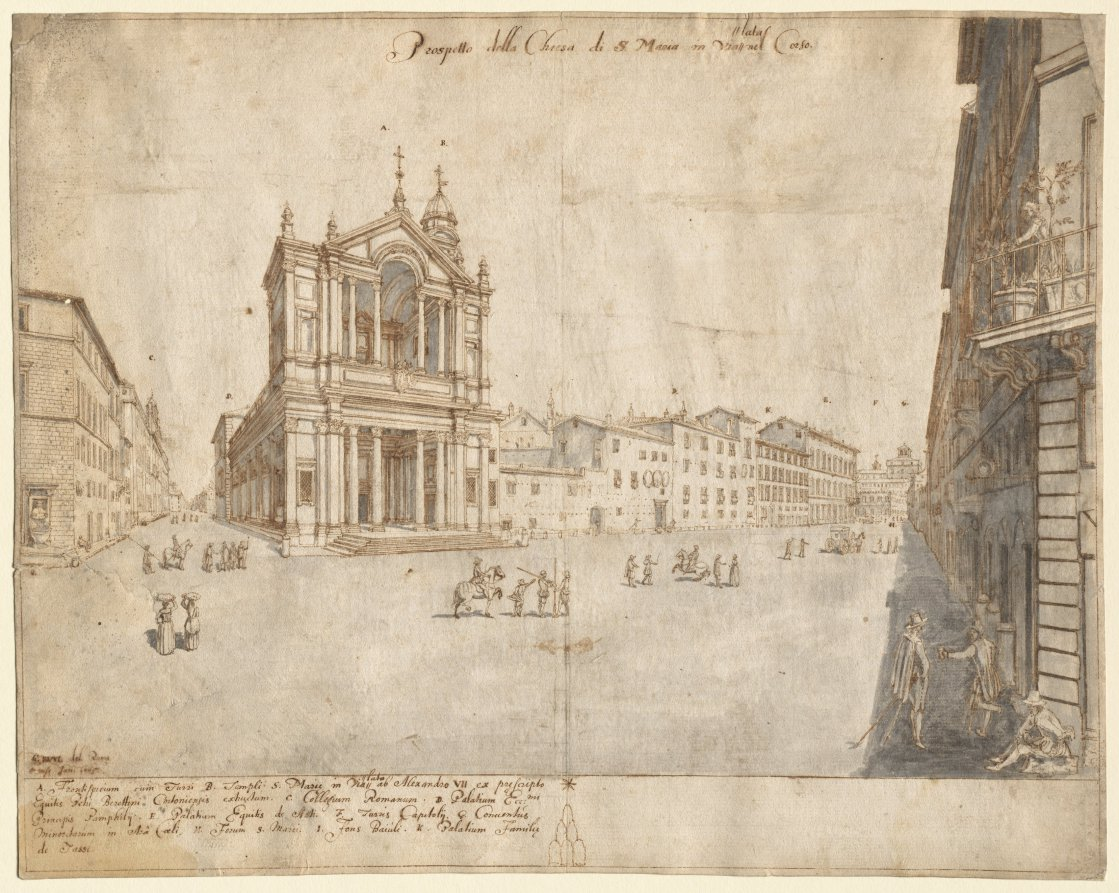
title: Eighteen Views of Rome: Santa Maria in Via Lata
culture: Flanders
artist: Lievin Cruyl (Flemish, c. 1640-c. 1720)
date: 1665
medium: pen and brown ink and brush and gray wash over graphite; framing lines in brown ink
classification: Drawing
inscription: signed, lower left, in brown ink: [artist monogram: LC] RVYL del. Romæ / mense Jan. 1665. ; by artist, upper center, in brown ink: Prospetto della Chiesa di S. Maria in Via// [double slashes acting as insert mark for addition to inscription, by artist, directly above: //lata] nel Corso. ; by artist, throughout composition, in brown ink: [the letters A-K] ; by artist, lower left, in brown ink: A. Frontispicium cum Turri B. Templi S. Mariæ in Via// [double slashes acting as insert mark for addition to inscription, by artist, directly above: //lata] ab Alexandro VII ex prescripto / Equitis Petri Berettini Cortonensis extructum. C. Collegium Romanum. D. Palatium Ecc:mi [mi in superscript] / Principis Pamphilij. E. Palatium Equitis de Asti. F. Turris Capitolij G. Conventus / Minoritarum in Arâ Coeli. H. Forum S. Marci. I. Fons Baiùli. M. Palatium Familiæ / de Tassi. ; VERSO, lower left, in brown ink: [S45 ?] [partially masked, sideways] ; ON STRIPS OF PAPER MOUNTED TO VERSO, lower center, in graphite: A20982 ; lower right, in graphite: E.9